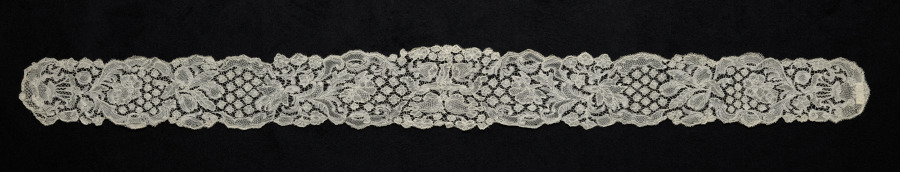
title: Lace Lappet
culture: Flanders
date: 1700s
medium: Linen; bobbin lace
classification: Lace